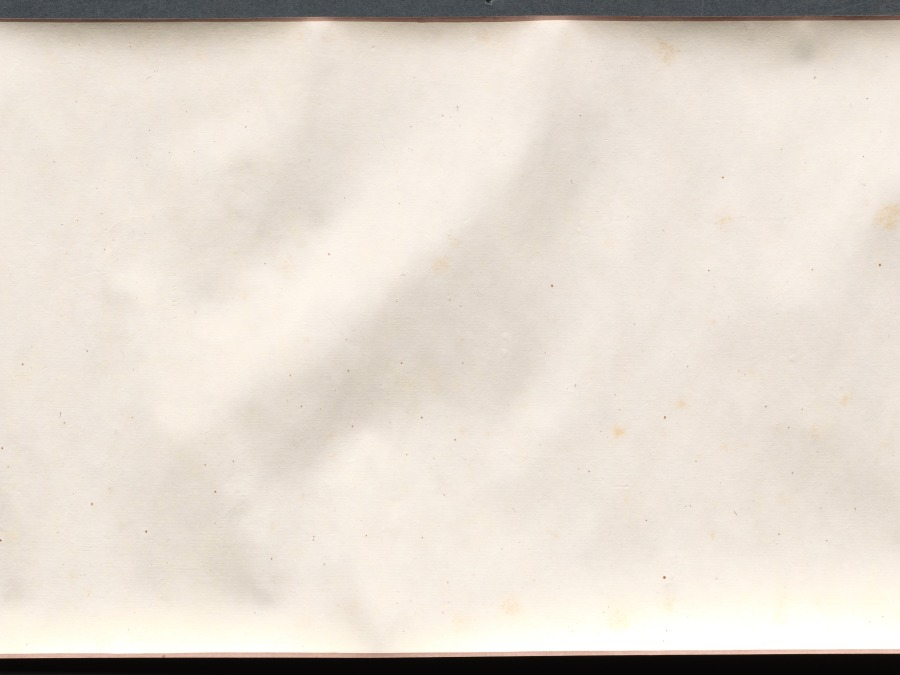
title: Four Poems: Calligraphy in Cursive Script (xingshu)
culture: China, Ming dynasty (1368–1644)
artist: Chen Jiru (Chinese, 1558–1639)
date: 1500s-1600s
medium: handscroll; ink on gold speckled paper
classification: Calligraphy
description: Written in graceful calligraphy with well-composed characters, the artist communicates his thoughts and state of mind in four poems. Characters written in dark, thick strokes convey rhythm, and indicate the moment after the writer had paused to recharge his brush with ink. Chen Jiru was a native of Huating (modern Shanghai). His calligraphy style resembles that of his friend, influential calligrapher Dong Qichang (1555–1636). Unlike Dong, Chen did not pursue government service: he burned his Confucian robes, declined a summons to serve at court, and immersed himself in literature, calligraphy, and painting.